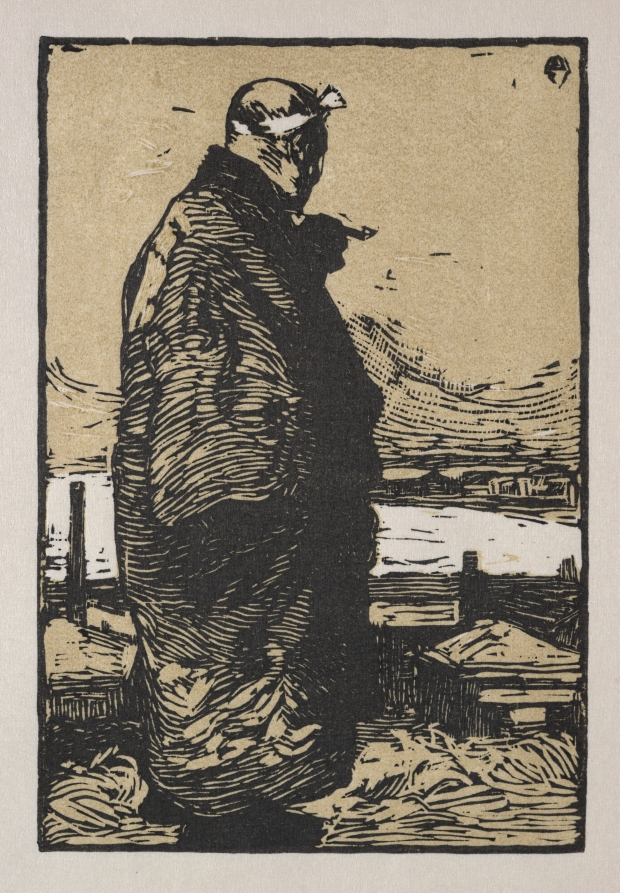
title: Fisherman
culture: Japan, Meiji period (1868–1912)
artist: Yamamoto Kanae (Japanese, 1882–1946)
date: 1906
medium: woodcut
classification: Print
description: This modest print marks the beginning of the sosaku-hanga movement which encouraged artists to carve and print woodblocks themselves. Fisherman, featured in the art and literary magazine Myojo (Morning Star) in 1904, accompanied an article describing Yamamoto’s revolutionary defiance of the traditional separation between the originator of the design and the artisans who execute the print, elevating woodcuts to the level of fine art. The print is also unmistakably modern in the simple, poignant depiction of the old man of the sea and in the artist’s deliberate retention of traces left by the gouge that cut the block. From the mid-19th century, when European and American artists first discovered ukiyo-e prints, Japanese pictorial conventions had a major influence on Western art. In the same way, when American naval officer Matthew Perry arrived in Japan in 1853, ending the island’s 200 years of seclusion, Japanese artists began to emulate aspects of European art. Yamamoto was impacted by British printmaker William Nicholson, who in turn had derived his bold style of a flat figure against an unmodulated background from Japanese woodcuts.